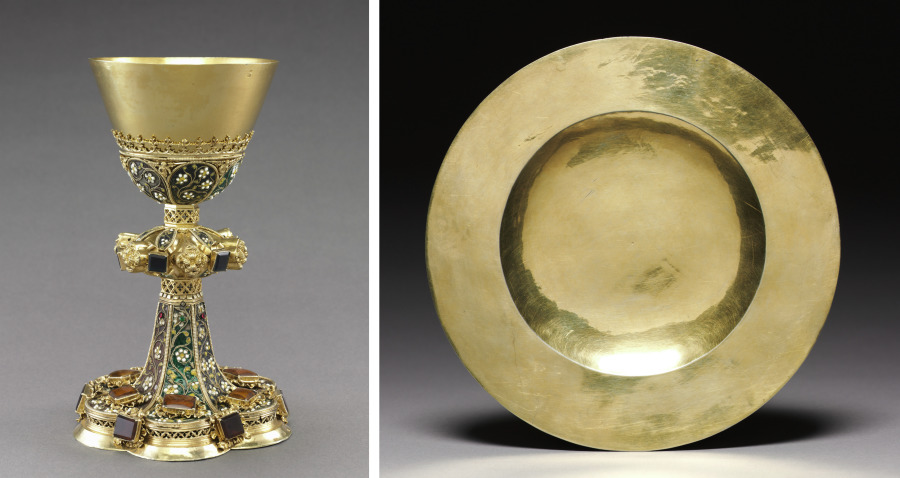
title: Chalice and Paten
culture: Hungary, Budapest?, 15th century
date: c. 1450–1480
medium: gilt silver and filigree enamel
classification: Metalwork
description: The chalice and paten—the most important liturgical vessels—are used at the altar by the priest for the consecration of the Eucharistic bread and wine during the celebration of the mass. This chalice survives with its original paten. The form of the chalice evolved over the centuries. Gothic chalices, like this one, gradually developed angular or faceted knops, generally hexagonal, with lobed feet. This sublime example is decorated with filigree enamel consisting of twisted gold wire forming a floral design, which in turn is filled with colorful glass pastes. Gemstones add to the embellishment.